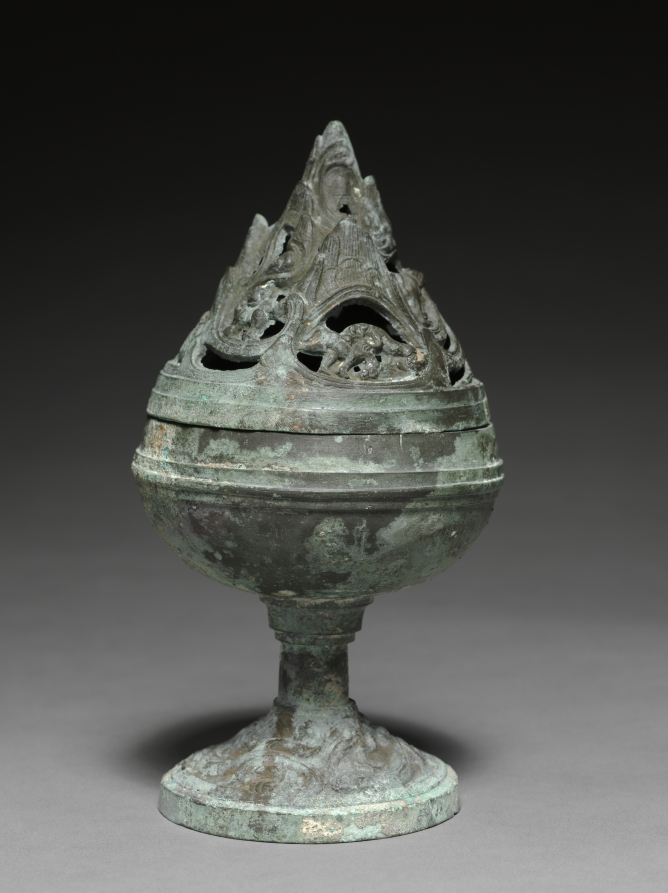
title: Incense Burner (Boshan Lu)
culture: China, Western Han dynasty (206 BCE–8 CE)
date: 200–100 BCE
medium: bronze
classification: Metalwork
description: The conical cover of this incense burner represents a miniature mountain with hunting scenes. The cover was shrouded in mist and emanated intoxicating smoke through its openwork when fragrant woods and herbs were burnt in its stem cup, transporting its beholder into an imaginative realm.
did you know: Deities (appearing as hunters) and fantastic beasts roam freely among mists and clouds on this incense burner.